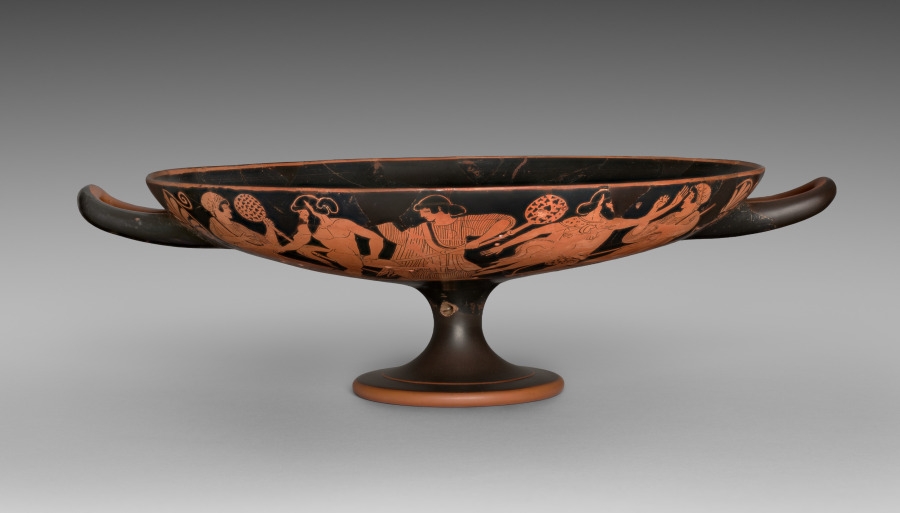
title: Red-Figure Kylix (Drinking Cup): Dionysos and Satyr (I); Satyrs and Maenads (A, B)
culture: Greece, Athens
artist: attributed to Douris (Greek, Attic, active c. 500–470 BCE)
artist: or Painter of London E 55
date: c. 480 BCE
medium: ceramic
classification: Ceramic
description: Reconstructed from 72 fragments, this cup has been repaired several times, indicating its enduring value to owners. Pairs of holes straddling cracks once held ancient wire or clamp repairs. Numerous incomplete holes may signify recent interventions. Early modern efforts to hide cracks and certain features of the satyrs that could have offended sensibilities of the time also masked the original artistry of its painting. So, for many years the cup languished in storage. Cleaning and reconstruction in 1952–53 revealed enough to allow attribution to a respected vase painter, Douris, reviving the cup’s reputation. More recently, a different attribution has been suggested, and a new conservation campaign replaced ancient parts from a different cup with modern reconstructions more like those lost.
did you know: In the tondo, a dancing satyr approaches the wine god Dionysos, who holds a kantharos and grapevine.